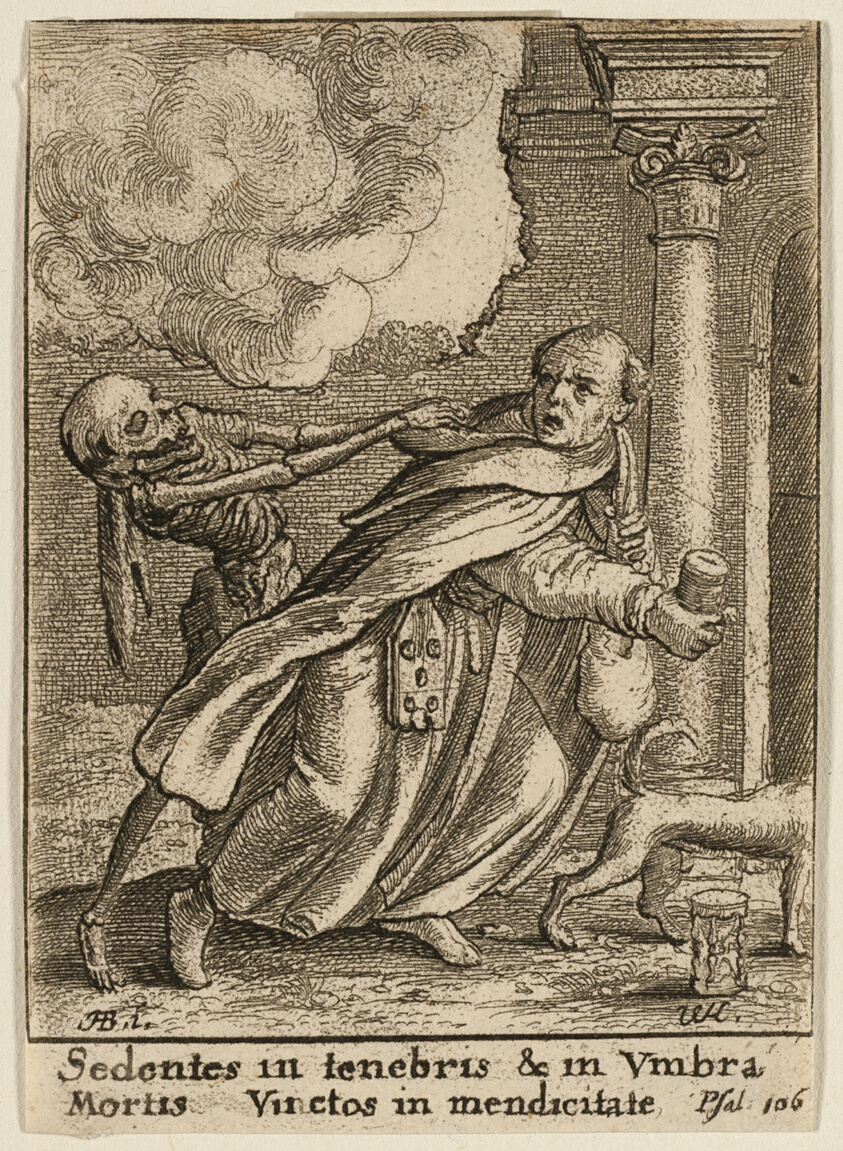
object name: Print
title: The Monk and Death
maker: Wenceslaus Hollar (Bohemian, 1607-1677); after Hans Holbein the younger (German, c.1497-1543)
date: 1651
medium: Etching on ivory wove paper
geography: Bohemia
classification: etching; print; prints and drawing